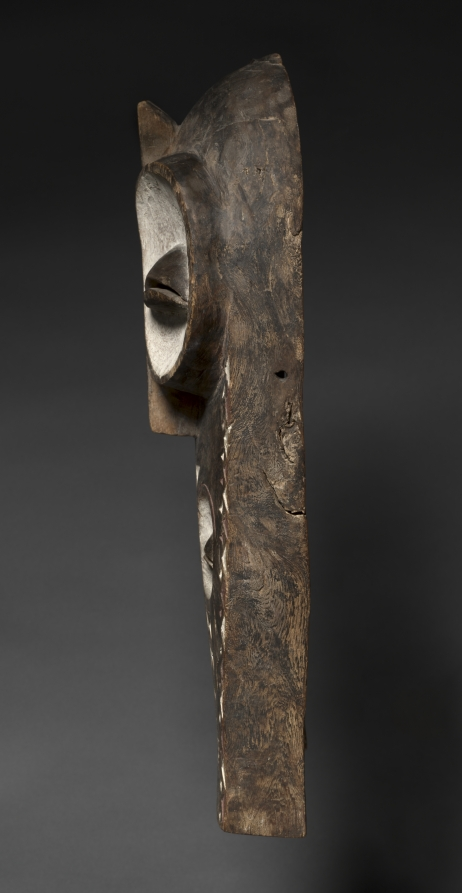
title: Mask (Emangungu)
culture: Africa, Central Africa, Democratic Republic of Congo, Bembe-style maker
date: possibly early 1900s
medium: Wood, kaolin, colorant, and iron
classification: Mask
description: Among the Bembe, anthropo-zoomorphic plank masks are used in circumcision rites called butende. They are worn along with a costume of bark and banana leaves by the initiated boys who beg for food in the village while living in seclusion in the forest. The sculpture’s short projections above the forehead are identified as an owl’s tufts. The two pairs of eyes could refer to divination.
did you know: White kaolin clay highlights the eyes of this carved wooden mask.